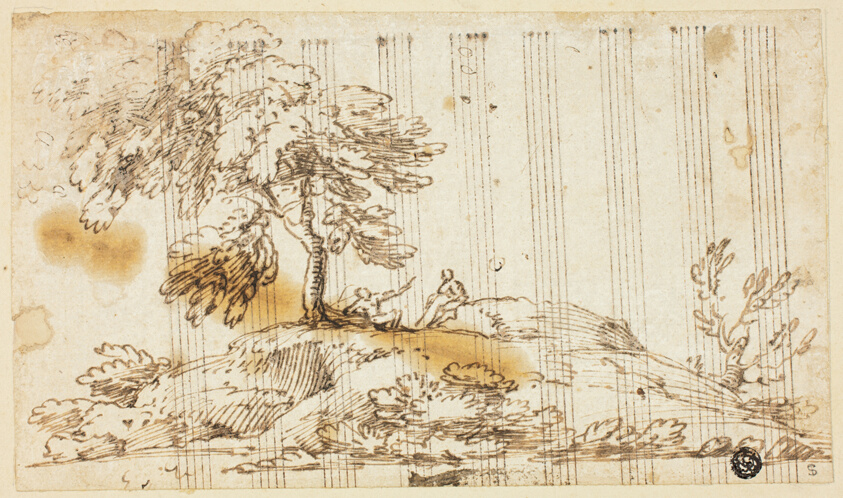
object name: Drawing and Watercolor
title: Two Men Seated under Tree on Hillside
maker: Circle of Giovanni Francesco Grimaldi; Italian, 1606-1680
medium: Pen and brown ink on ivory laid paper, laid down on cream laid paper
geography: Italy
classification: pen and ink drawings; drawings (visual works); prints and drawing